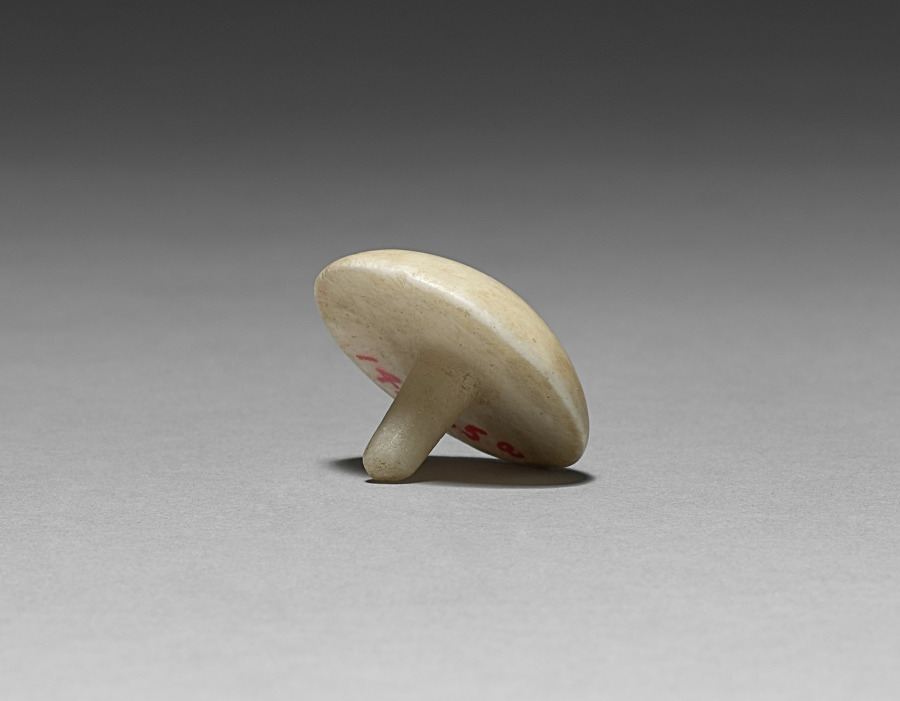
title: Earring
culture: Egypt, New Kingdom (1540–1069 BCE), Dynasty 18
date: 1540–1296 BCE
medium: travertine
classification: Jewelry